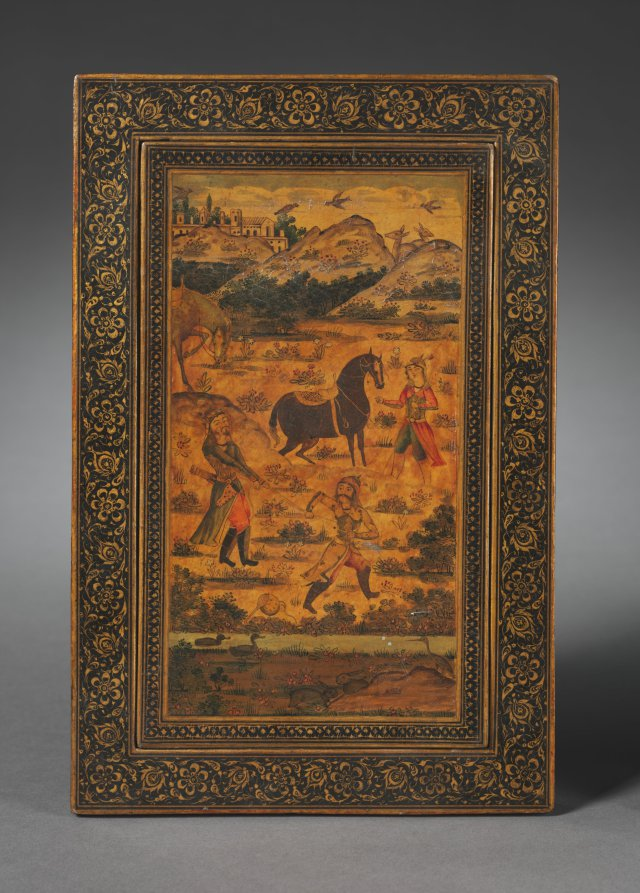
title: Mirror Case with Lid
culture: Iran, Qajar period (1779-1925)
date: 1800s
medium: Varnished lacquer and opaque watercolor over papier-mâché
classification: Lacquer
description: Love and war are the themes of the paintings on the inside and outside of this mirror case. The inside surface of the lid is painted with a royal couple seated, touching each other, within a walled garden. In front of them a female dancer performs and another pours a cup of wine. Military scenes are painted on the exterior sides; on the underside of the case enemies flee, heads roll, and a corpse lies before the victorious king and his armies.